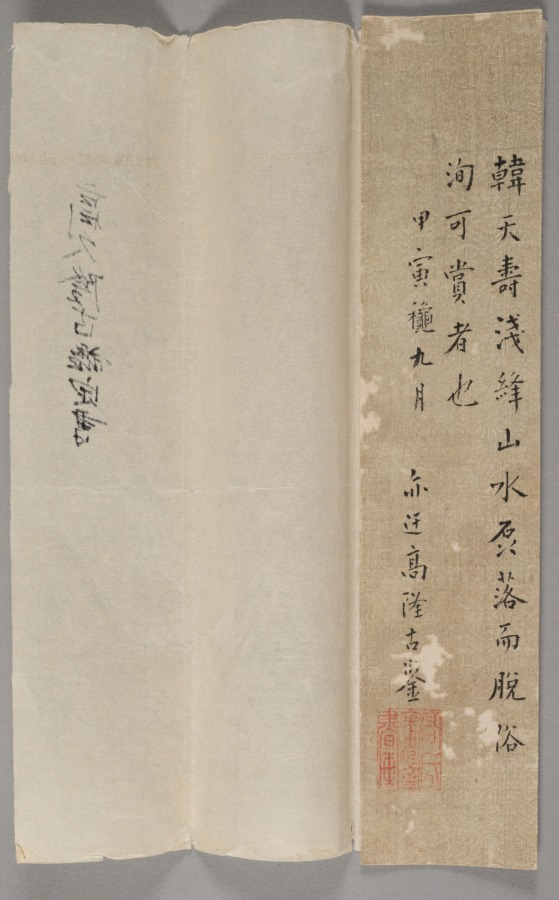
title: Landscape with Gentle Peaks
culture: Japan, Edo period (1615–1868)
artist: Kan Tenju (Japanese, 1727–1795)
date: 1767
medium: hanging scroll; ink and light color on paper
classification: Painting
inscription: 雨過嵐光煙／雲陽樹影諫／夕陽独在左／？卷讀残書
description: A figure sits in a retreat tucked into the mountains near a waterfall. The painter, Kan Tenju, was best known as a calligrapher and seal carver. Of Korean heritage, he was a patron of artist Ike Taiga (池大雅) (1723–1776), and a cousin of Taiga’s student Aoki Shukuya (青木 夙夜) (died 1802). His Chinese-style poem reads as follows: Smoky mist in the mountain reflects light after the rain, Sunlight passes through the clouds to cast shadows of the trees, Alone in the sunset, I read a well-worn book.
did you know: This painting combines image and calligraphy, connected by skillful brushwork.